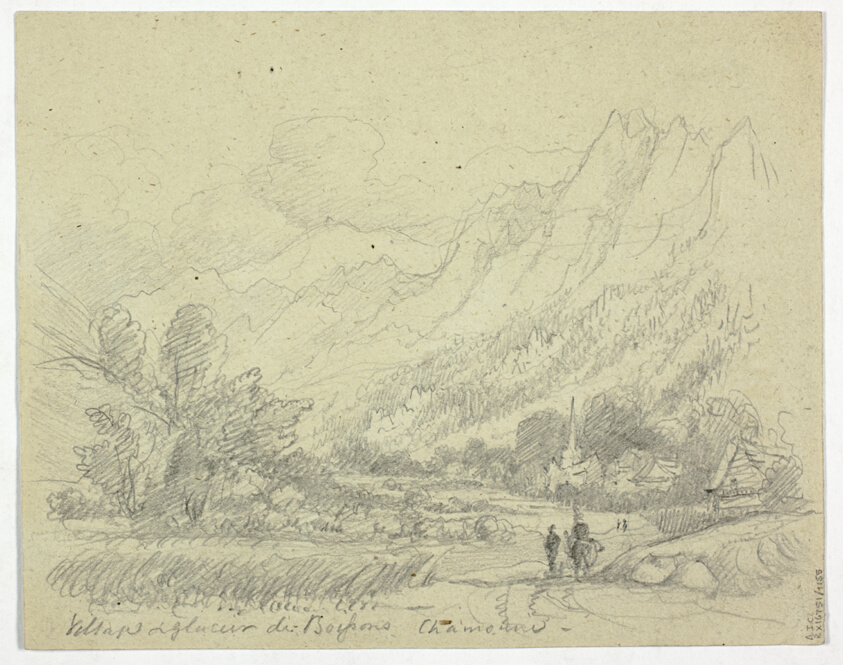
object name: Drawing and Watercolor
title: Chalet and Garden below Alps (recto); Village & Glacier du Boissons, Chamix (verso)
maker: Unknown Artist; British or Swiss, 19th century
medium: Pen and brown ink with brush and watercolor, heightened with lead white, over graphite (recto), and graphite (verso), on ivory wove paper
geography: United Kingdom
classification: watercolor; drawings (visual works); prints and drawing